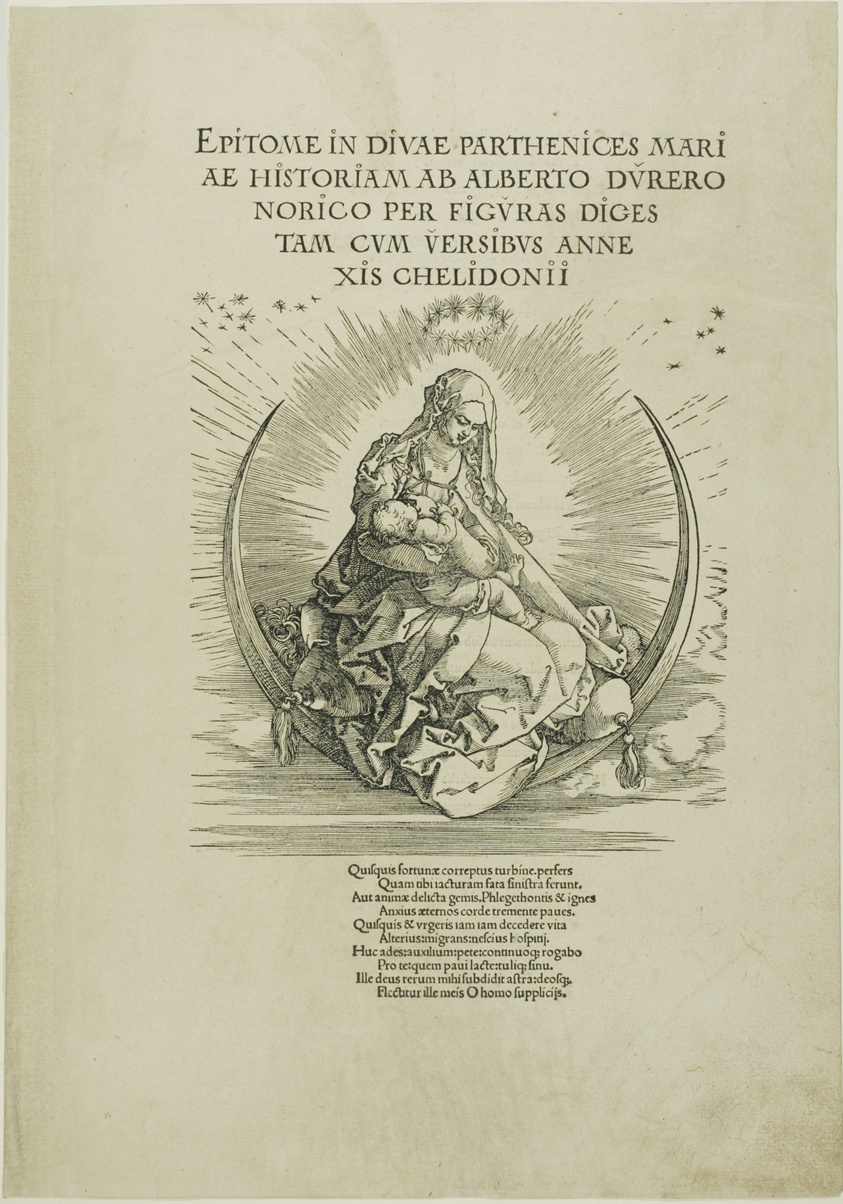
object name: Print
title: The Virgin on the Crescent, from The Life of the Virgin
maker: Albrecht Dürer (German, 1471-1528)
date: c. 1511, published 1511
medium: Woodcut in black on tan laid paper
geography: Germany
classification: woodcut; print; prints and drawing; paper